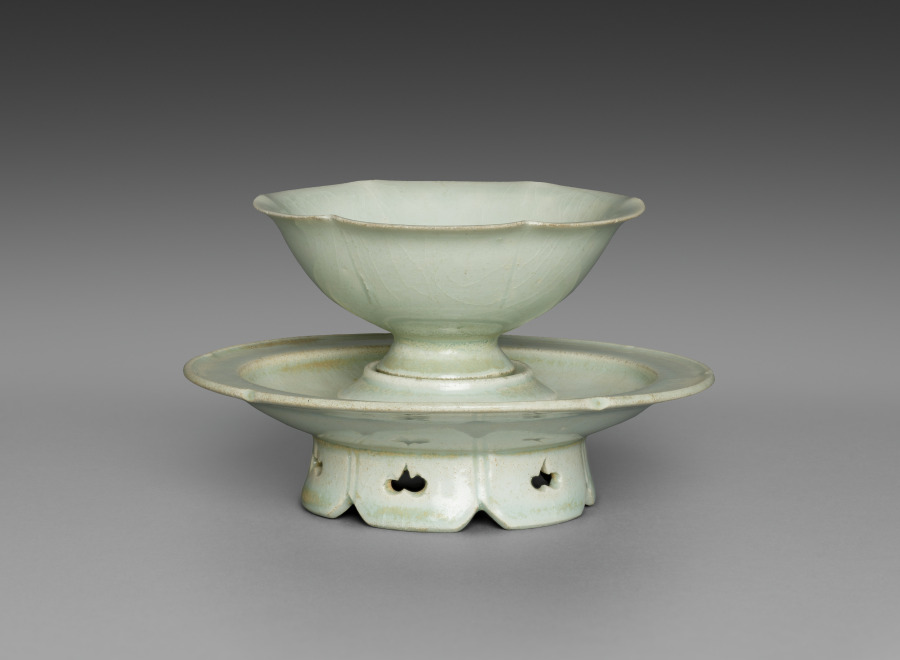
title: Cup and Stand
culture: China, Jiangxi province, Jingdezhen, Southern Song dynasty (1127-1279)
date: 1100s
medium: Porcelain with pale bluish-white glaze, qingbai ("blue-white") ware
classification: Ceramic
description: The kilns of Jingdezhen in Jiangxi province produced an extremely delicate porcelain made from the local resources of kaolin (white China clay) and petuntse (a feldspathic rock called china stone). It is glazed with a clear bluish-white glaze, thus the name qingbai (blue-white) or yingqing (shadowy blue) for this type of ware.